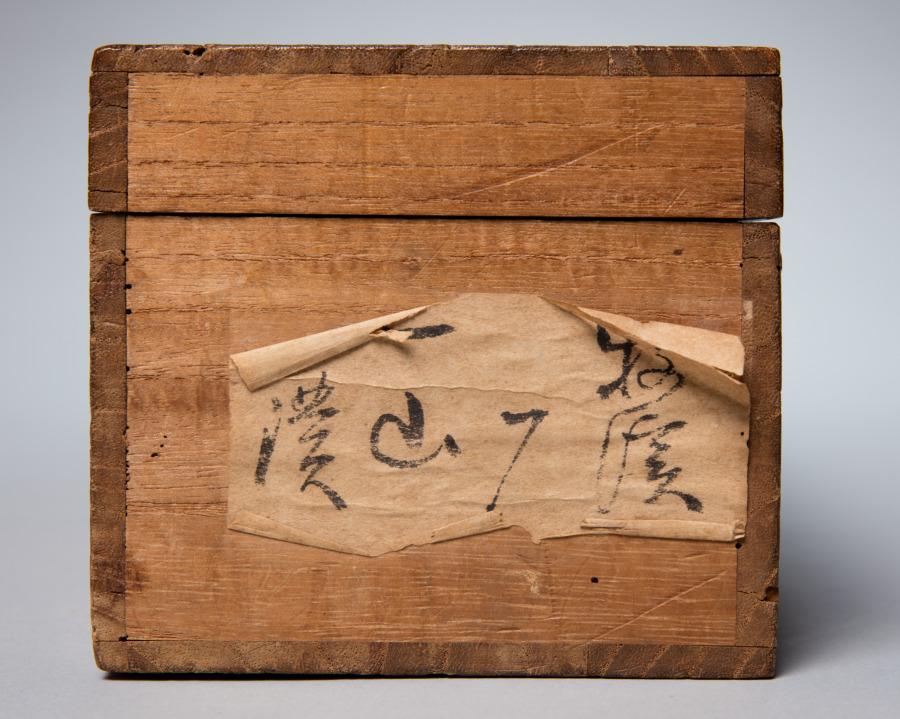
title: Reeds and Geese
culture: Japan, Kamakura period (1185–1333)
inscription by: Yishan Yining [Issan Ichinei] (Chinese, 1247–1317)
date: 1314–17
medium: hanging scroll; ink on paper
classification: Painting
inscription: signed: Issan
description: Reeds and geese has been a common pairing in Chinese literary and visual culture for many centuries. This painting presents the contribution of a Japanese amateur painter, almost certainly a Zen Buddhist monk, to Japan’s fledgling efforts to add the theme to its own cultural vocabulary in the early 1300s. As was customary at the time in Japan, the painter did not sign or seal his work; the inscription, a poem added to the painting by the eminent émigré monk Yishan Yining, along with his signature and seal, was of far greater cultural value. Today, the modestly sized painting has tremendous significance as one of the earliest surviving examples of Japanese ink paintings with reeds and geese.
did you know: Tokyo National Museum owns a copy of this painting made by Kano Gyokusen (1796–1864) when he was 14 years old.